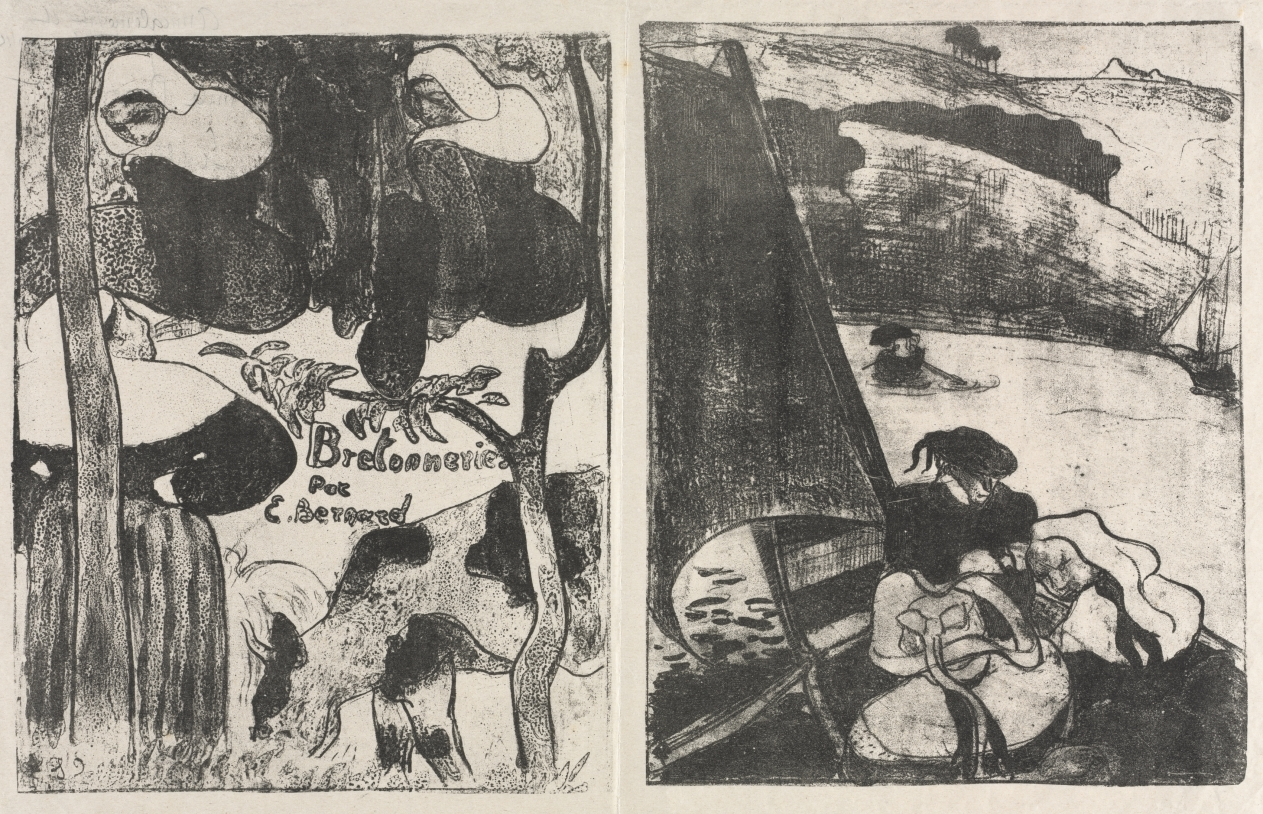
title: Les Bretonneries: Title Page (Page de Titre) and The Return from the Pilgrimage (Le Retour du Pardon)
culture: France, 19th century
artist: Émile Bernard (French, 1868–1941)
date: 1889, printed 1896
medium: zincograph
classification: Print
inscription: inscribed on verso of title page: A Don Ignatio Zuloago/ Amicalement et/ avec Grattitude artistique/ Emile Bernard/ Seville 1897